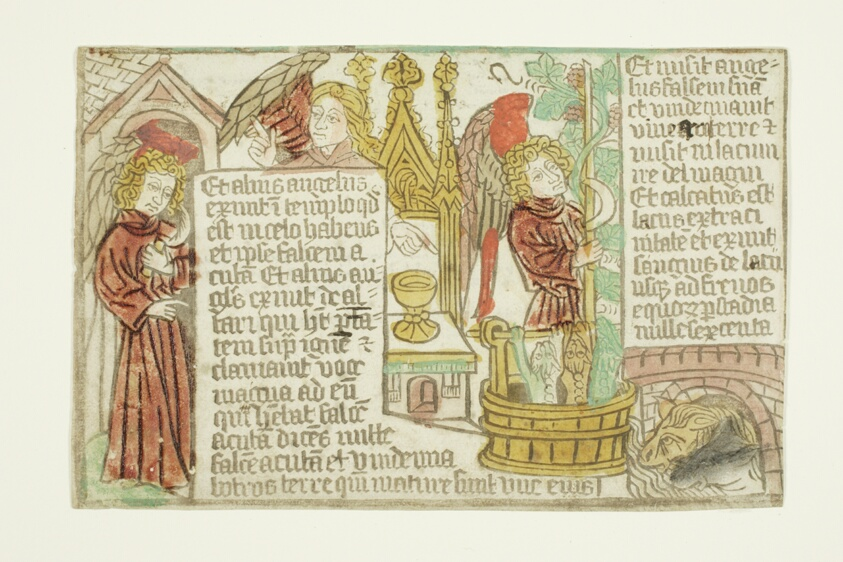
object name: Print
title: The Vintage of the Grapes of the Vine, from the Blockbook Apocalypse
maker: Unknown Artist; German, 15th century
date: 1465–70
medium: Hand-colored woodcut on cream laid paper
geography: Germany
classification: woodcut; print; prints and drawing